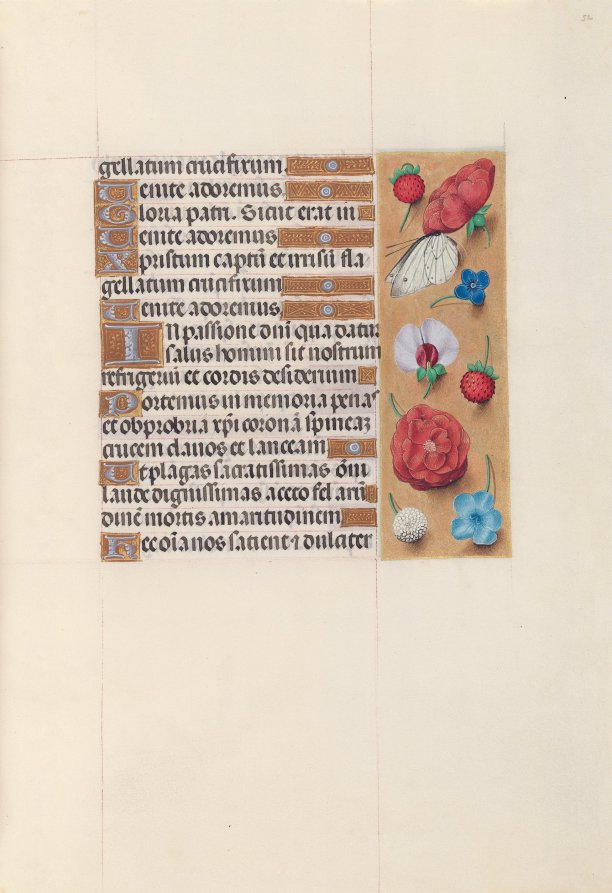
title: Hours of Queen Isabella the Catholic, Queen of Spain: Fol. 52r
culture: Flanders, Ghent and Bruges, late 15th century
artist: Master of the First Prayerbook of Maximillian (Flemish, c. 1444–1519)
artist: and Associates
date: c. 1500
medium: ink, tempera, and gold on vellum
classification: Bound Volume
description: This manuscript was illuminated by a circle of at least five highly organized manuscript painters active in the Flemish cities of Ghent and Bruges. The principal illuminator was Alexander Bening, who painted the majority of the book's miniatures. Manuscripts produced by this circle of artists are renowned for the decoration of their borders, which typically feature a rich variety of realistically-painted flowers, birds, and butterflies. This prayer book, called a book of hours, was intended not for a cleric, but for the private devotions of a lay person-in this case, Isabella the Catholic, Queen of Spain (1451-1504). Isabella's coat of arms embellishes the book's frontispiece. It is unlikely that the book was commissioned by the Queen herself; rather, she probably received it as a diplomatic gift from someone courting her patronage, perhaps Cardinal Francisco Jimenez de Cisneros. A Franciscan friar, Jimenez was dependent upon Isabella for his advancement, first to the post of Queen's confessor in 1492, and then to Archbishop of Toledo in 1495.